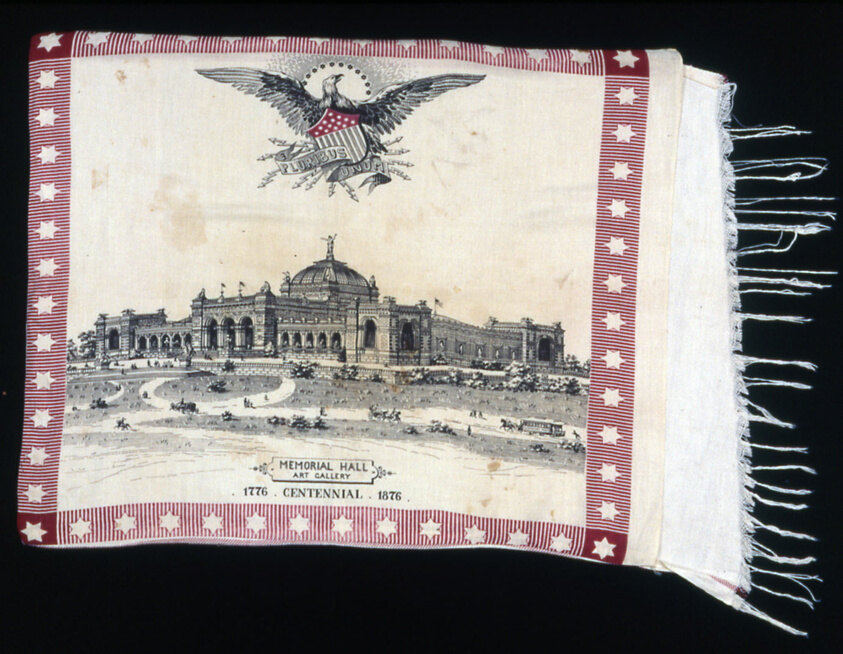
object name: Textile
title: Pillow Cover (Furnishing Fabric)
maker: United States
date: 1876/80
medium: Cotton, plain weave; engraved roller printed; backed with cotton, twill weave; stamped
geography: United States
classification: textile; weaving - printed; furnishing textile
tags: propaganda